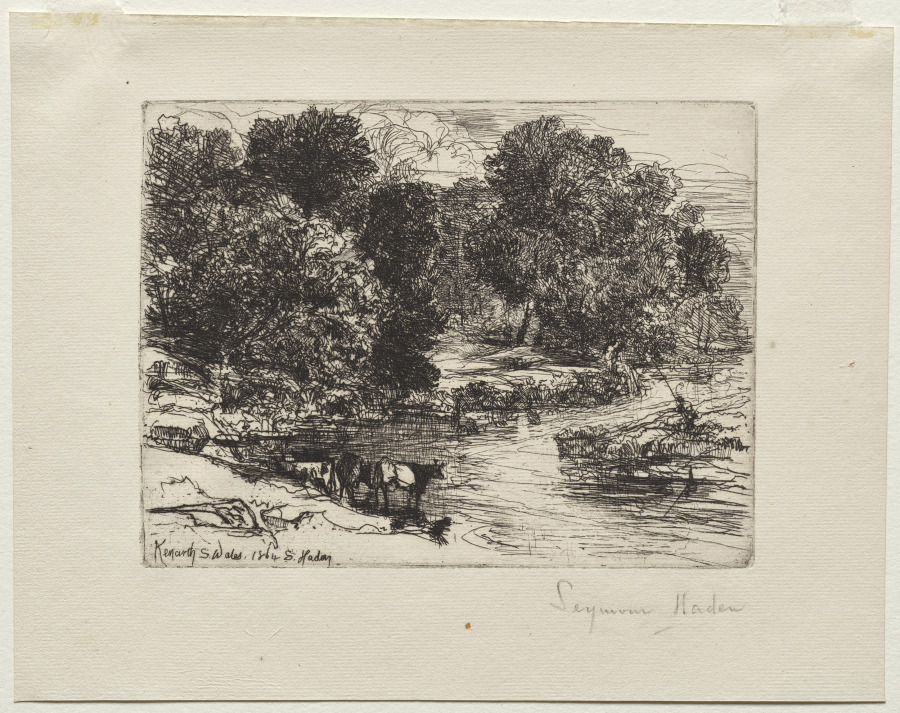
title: Kenarth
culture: England, 19th century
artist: Francis Seymour Haden (British, 1818–1910)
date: 1864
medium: etching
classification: Print